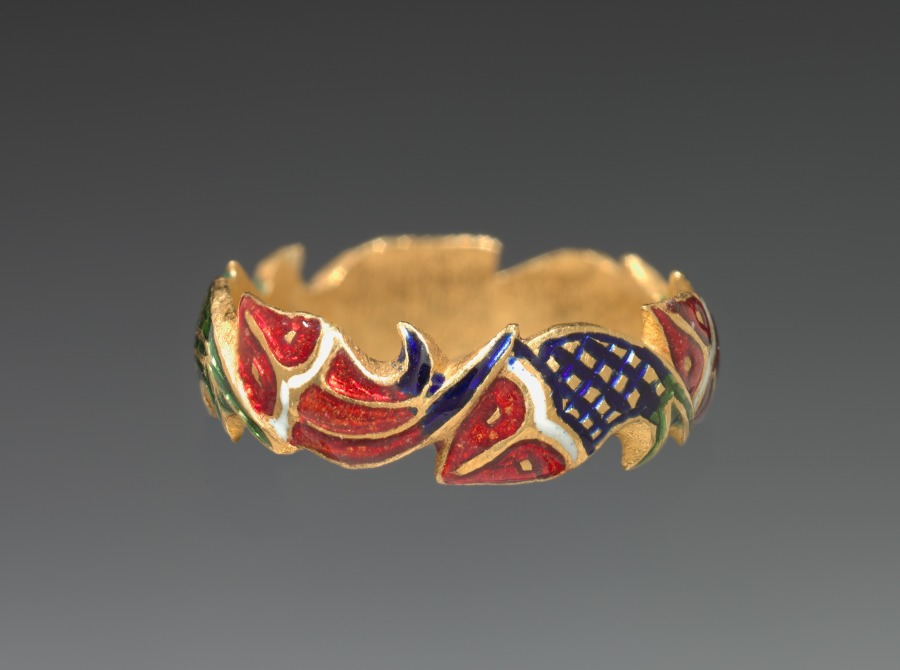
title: Ring in the Form of Six Fishes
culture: India, Jaipur, 18th century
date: 1700s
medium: gold, enamel and gems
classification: Jewelry